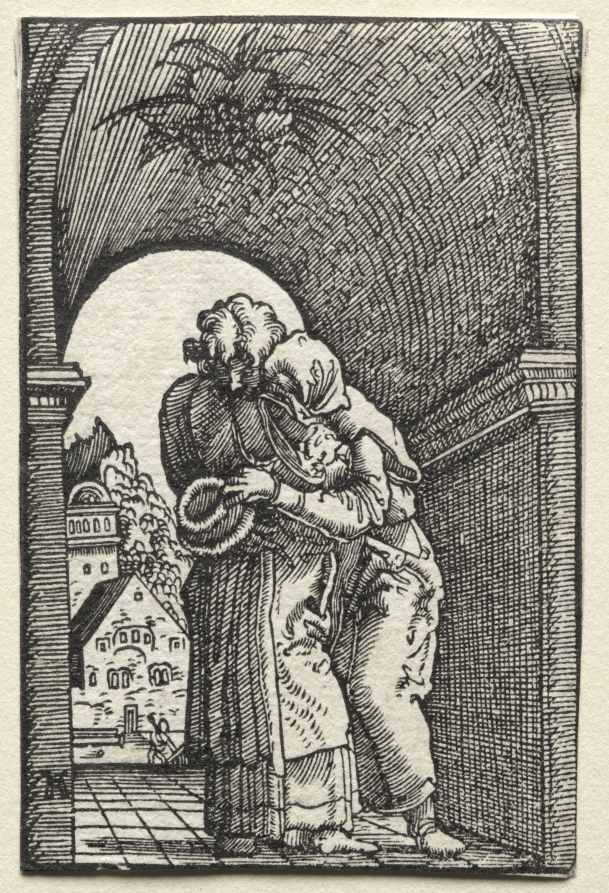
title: The Fall and Redemption of Man: The Embrace of Joachim and Anne at the Golden Gate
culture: Germany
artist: Albrecht Altdorfer (German, c. 1480–1538)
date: 1515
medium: woodcut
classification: Print